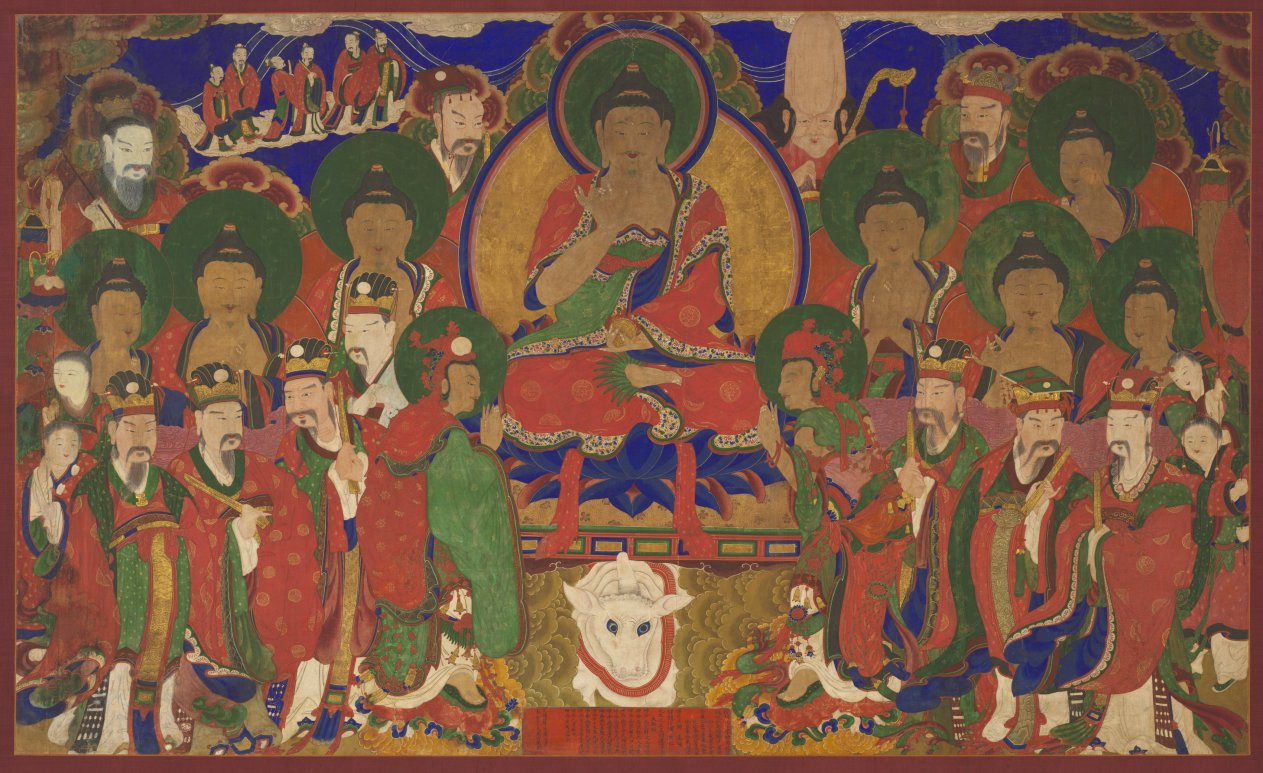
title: The Assembly of Tejaprabha Buddha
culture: Korea, Joseon dynasty (1392–1910)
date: 1878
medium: hanging scroll; ink, color, and gold on silk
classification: Painting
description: The main deity seated at the center is Tejaprabha, the Buddha of Radiant Light. Blazing beams of light emanating from its celestial body are this deity’s weapon to crush all kinds of calamities. Coincidently, when this painting was created, Korea was experiencing a height of foreign military aggressions, including invasions by the French (1866) and the US (1871). The inscription at the bottom center states that a group of ladies from the royal court commissioned the scroll to wish for the well-being of their families. During the late Joseon dynasty, Korean women became largely marginalized. Nevertheless, they remained important patrons of Buddhist art and architecture, voicing their concerns for their country and families in peril.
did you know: The central Buddha of Radiant Light is flanked by two attendant bodhisattvas, Sunlight and Moonlight, each in reverence posture.